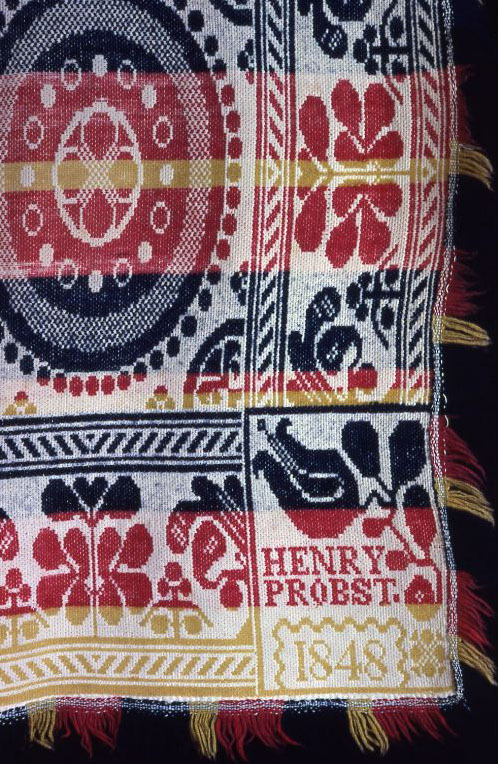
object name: Textile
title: Coverlet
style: 19th century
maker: United States, Pennsylvania, Lehigh County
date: 1848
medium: Cotton and wool, plain weave with plain interlacings of secondary binding warps and patterning wefts (Beiderwand); woven on loom with Jacquard attachment; full loom width; seamless; fringed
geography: Pennsylvania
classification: weaving - coverlet; coverlet; weaving; textile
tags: medallions, circles, flowers, coverlet